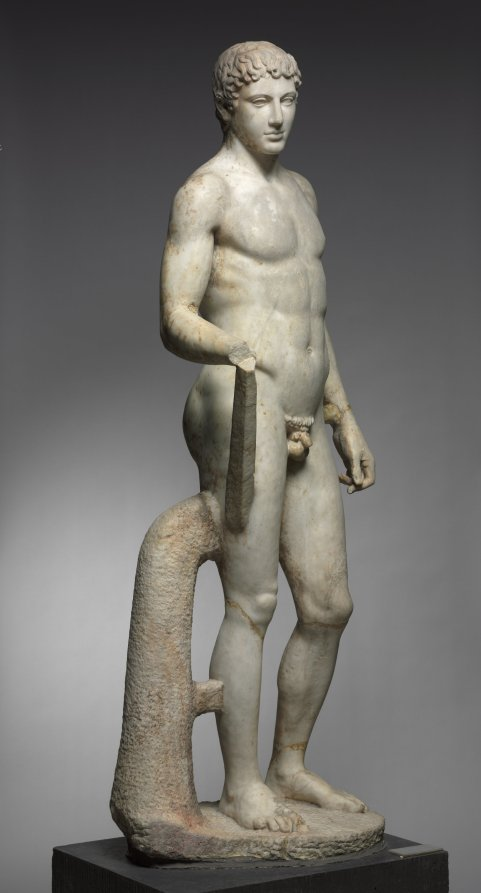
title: Statue of an Athlete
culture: Italy, Roman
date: 1–100 CE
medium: marble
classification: Sculpture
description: This idealized athlete recalls Greek sculptural types invented and popularized during the 400s BC. Large-scale athletes and other sculptures like this were originally created by famous artists as sanctuary dedications. Centuries later, they were widely copied and adapted by Roman sculptors, whose clients sought their own versions of earlier masterpieces. Working in marble rather than bronze, these sculptors added certain elements for stability, such as the struts and the large tree trunk beside the right leg here. Sculptures like this one are profoundly complex, made by and for Romans but descended from Greek ancestors.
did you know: For many years, this sculpture stood in the rotunda of the Cleveland Museum of Art.